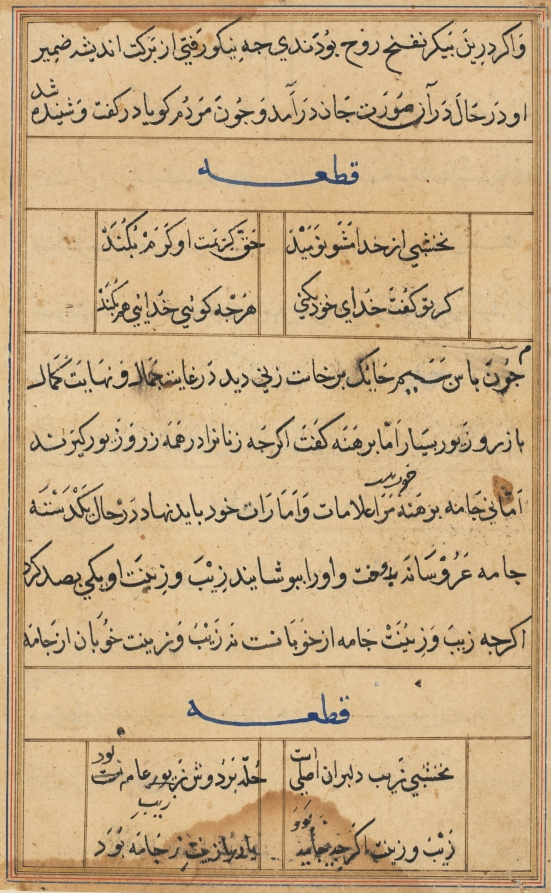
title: Page from Tales of a Parrot (Tuti-nama): text page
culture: Mughal India, court of Akbar (reigned 1556–1605)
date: c. 1560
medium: gum tempera, ink, and gold on paper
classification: Painting